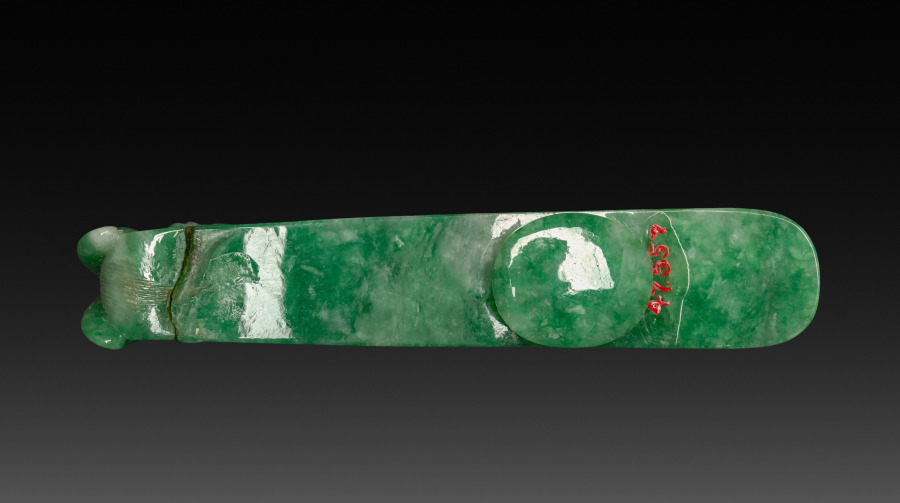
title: Belt Buckle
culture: China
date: 1800s–1900s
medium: jade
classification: Jewelry